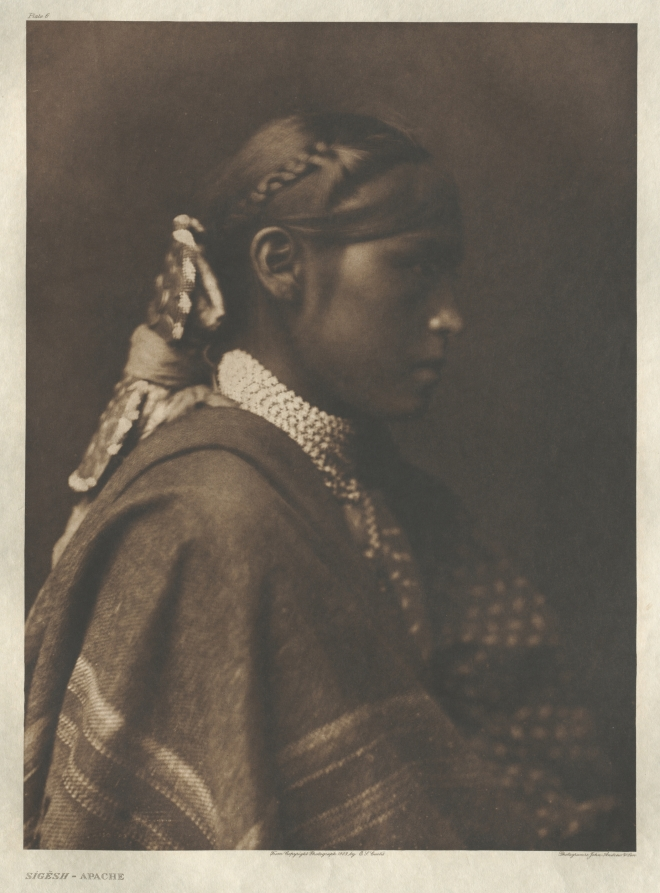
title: Portfolio I, Plate 6: Sígesh-Apache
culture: America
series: The North American Indian: being a series of Portfolios picturing and describing the Indians of the United States, the Dominion of Canada, and Alaska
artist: Edward S. Curtis (American, 1868–1952)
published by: The University Press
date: 1903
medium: photogravure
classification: Portfolio